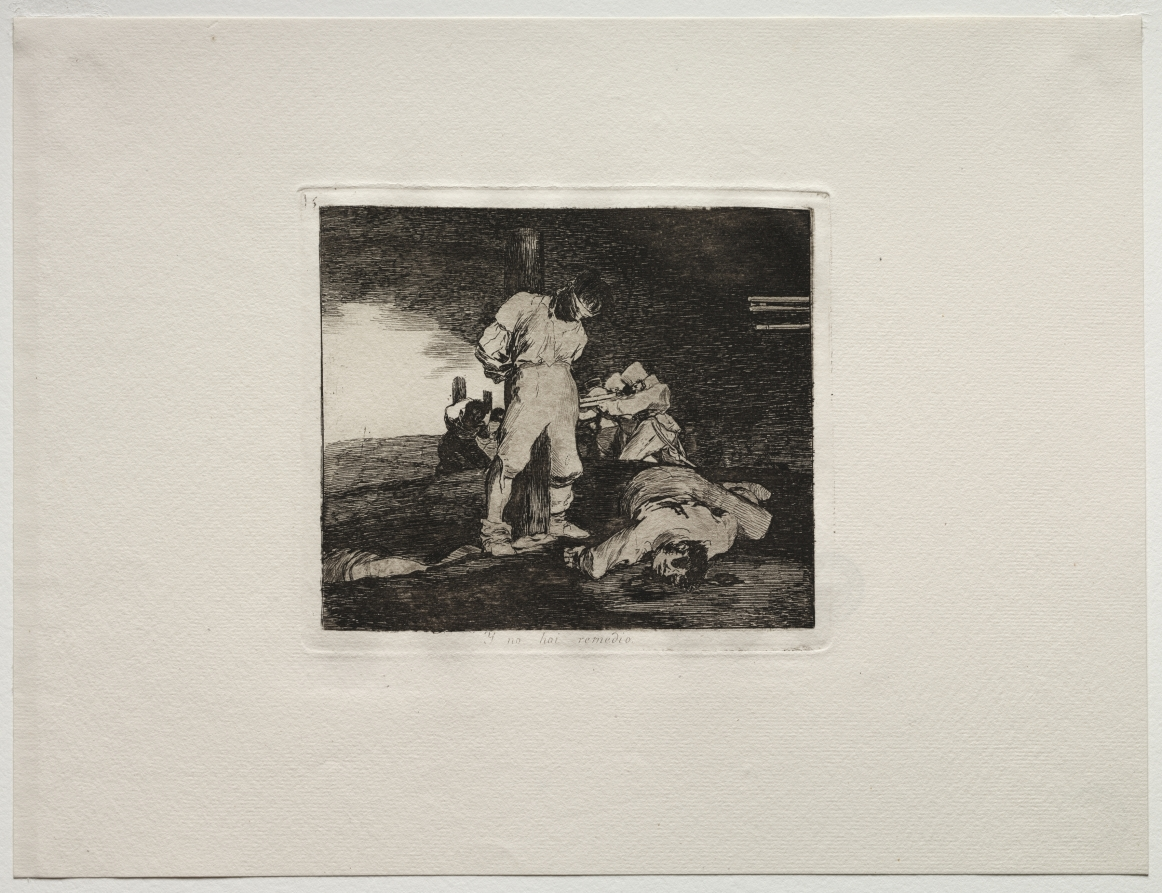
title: The Horrors of War: And There's No Help For It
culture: Spain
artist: Francisco de Goya (Spanish, 1746–1828)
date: c. 1810–20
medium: etching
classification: Print